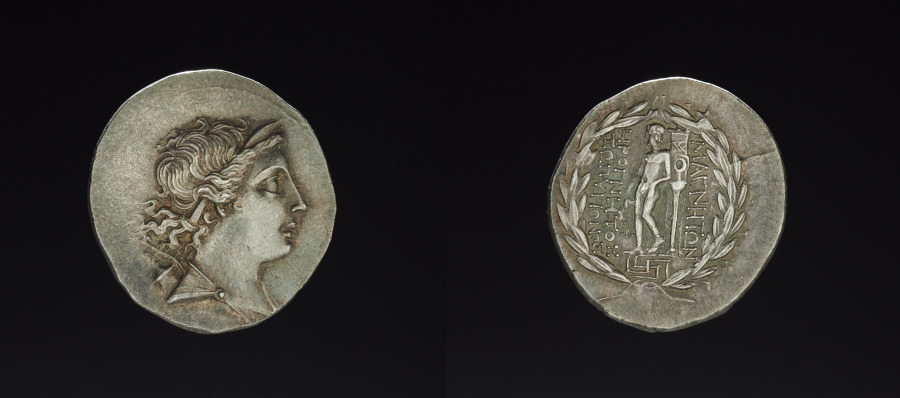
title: Tetradrachm Coin of Herognetos, Magistrate of Magnesia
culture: Turkey, Ionia, Magnesia on the Maeander, Hellenistic Period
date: 155–145 BCE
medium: silver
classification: Silver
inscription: MAGNETON EROGNETOS ZOPURIONOS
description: The front has a bust of Artemis, a diadem circling her head and a quiver over her shoulder. On the reverse is Apollo Delphios holding a laurel branch, standing on a meander pattern, and leaning his left elbow on a tripod, all within a laurel wreath. Magnesia is located southeast of Ephesus on a tributary of the Meander River.